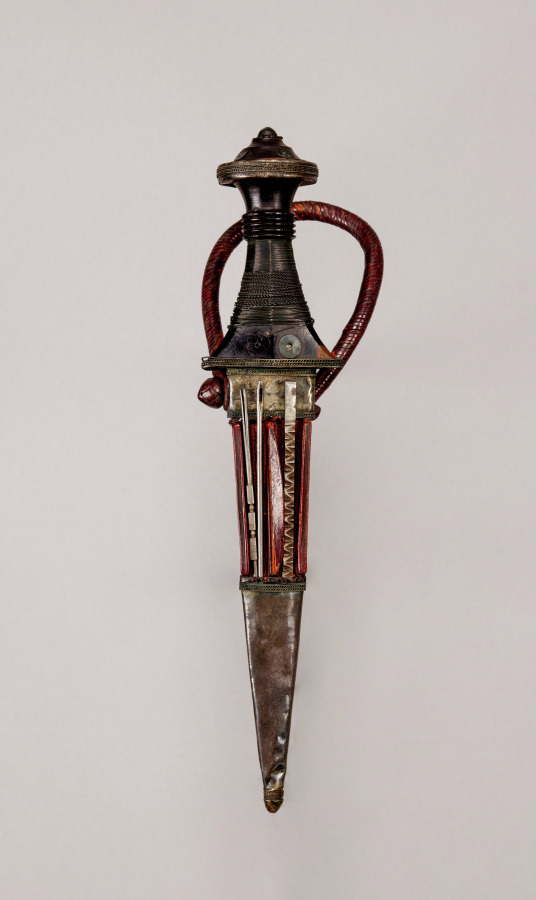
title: Dagger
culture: Africa, East Africa, Sudan, unknown maker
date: 1880–1910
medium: metal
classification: Arms and Armor